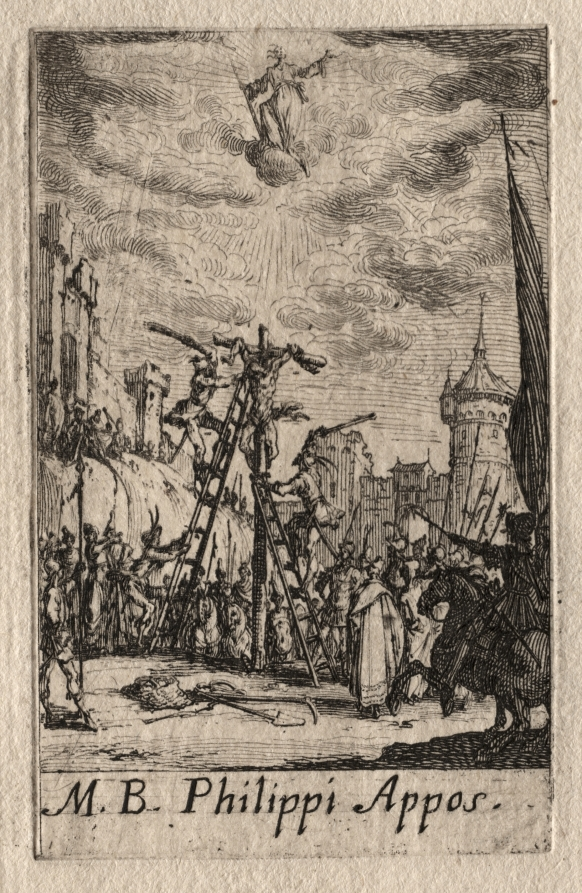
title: The Martyrdom of the Apostles: St. Philip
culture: France, 17th century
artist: Jacques Callot (French, 1592–1635)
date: ca. 1632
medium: etching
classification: Print